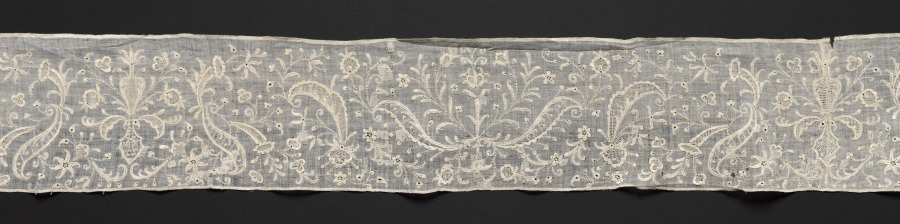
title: Band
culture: France(?)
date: 1700s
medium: Plain weave linen: needle lace (drawnwork) and embroidery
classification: Embroidery